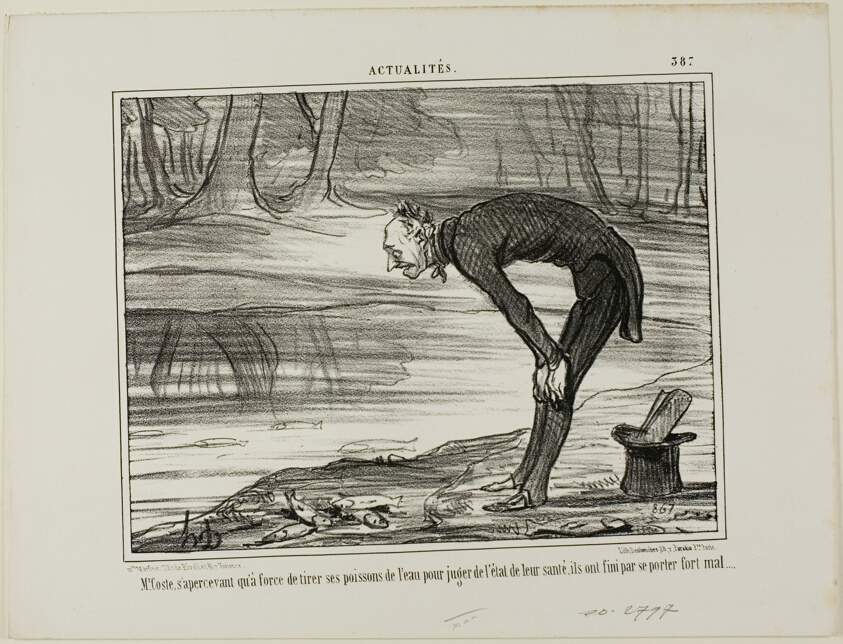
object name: Print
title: Mr. Coste noticing that the fish he took out of the water in order to analyse their state of health, end up feeling not well at all, plate 387 from Actualités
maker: Honoré Victorin Daumier; French, 1808-1879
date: 1857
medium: Lithograph in black on white wove paper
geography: France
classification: lithograph; print; prints and drawing